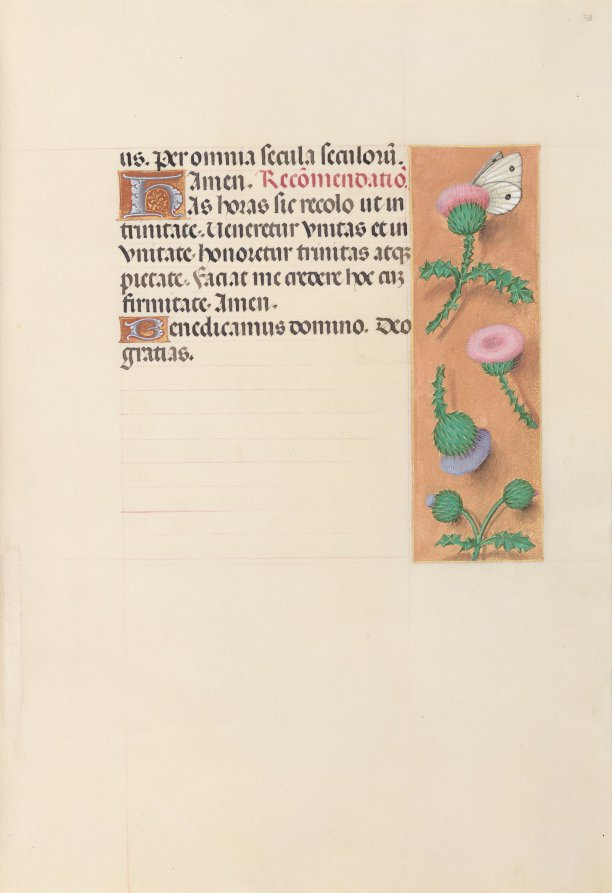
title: Hours of Queen Isabella the Catholic, Queen of Spain: Fol. 23r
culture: Flanders, Ghent and Bruges, late 15th century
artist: Master of the First Prayerbook of Maximillian (Flemish, c. 1444–1519)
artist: and Associates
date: c. 1500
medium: ink, tempera, and gold on vellum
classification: Bound Volume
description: This manuscript was illuminated by a circle of at least five highly organized manuscript painters active in the Flemish cities of Ghent and Bruges. The principal illuminator was Alexander Bening, who painted the majority of the book's miniatures. Manuscripts produced by this circle of artists are renowned for the decoration of their borders, which typically feature a rich variety of realistically-painted flowers, birds, and butterflies. This prayer book, called a book of hours, was intended not for a cleric, but for the private devotions of a lay person-in this case, Isabella the Catholic, Queen of Spain (1451-1504). Isabella's coat of arms embellishes the book's frontispiece. It is unlikely that the book was commissioned by the Queen herself; rather, she probably received it as a diplomatic gift from someone courting her patronage, perhaps Cardinal Francisco Jimenez de Cisneros. A Franciscan friar, Jimenez was dependent upon Isabella for his advancement, first to the post of Queen's confessor in 1492, and then to Archbishop of Toledo in 1495.